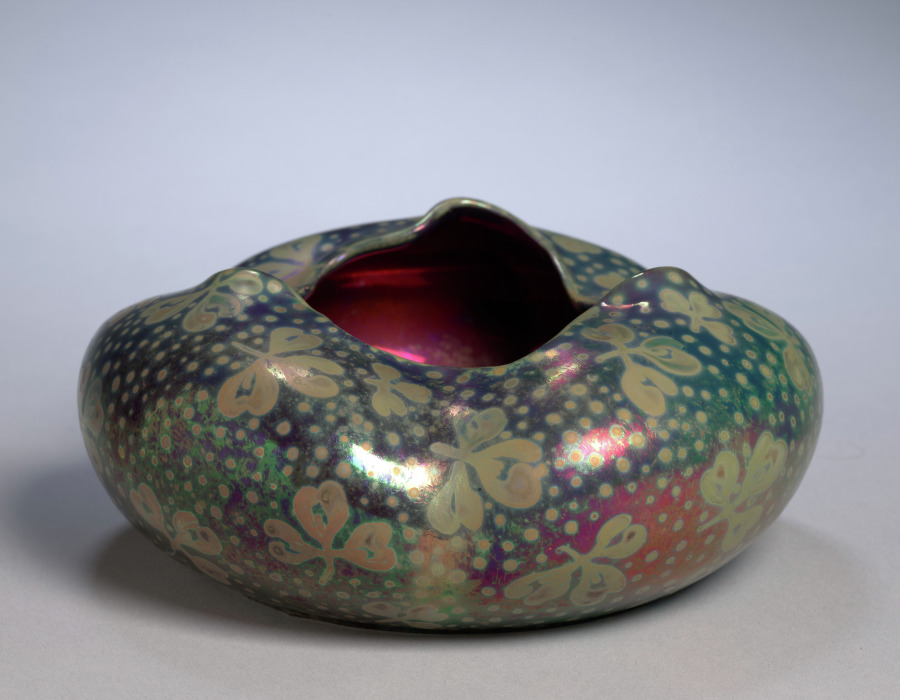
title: Bowl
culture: America, Ohio, Zanesville, early 20th Century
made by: Weller Pottery (American)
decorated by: Jacques Sicard (French, 1865–1923)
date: early 1900s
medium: earthenware decorated with lustre glazes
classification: Ceramic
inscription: inscribed on side near bottom: "SICA(?)D WELLER." Incised at center of bottom: 28.